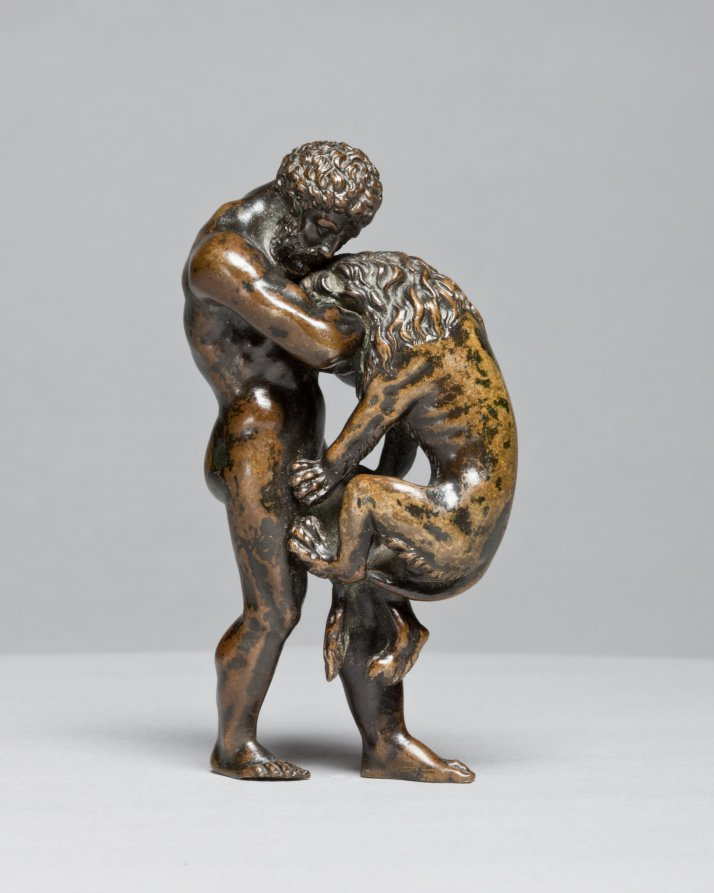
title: Hercules and the Nemean Lion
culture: Italy or France, 16th century or later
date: 1500s or later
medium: bronze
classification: Sculpture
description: The original owner of this work would have understood that this scene referred to the entire story of Hercules, the demi-god who had to accomplish twelve labors. The lion is named after the city of Nemea, near Corinth, a monstrous beast sent by the goddess Hera to wreak havoc on the area. After killing the lion, Hercules wore his pelt, commonly seen in other representations of the hero.